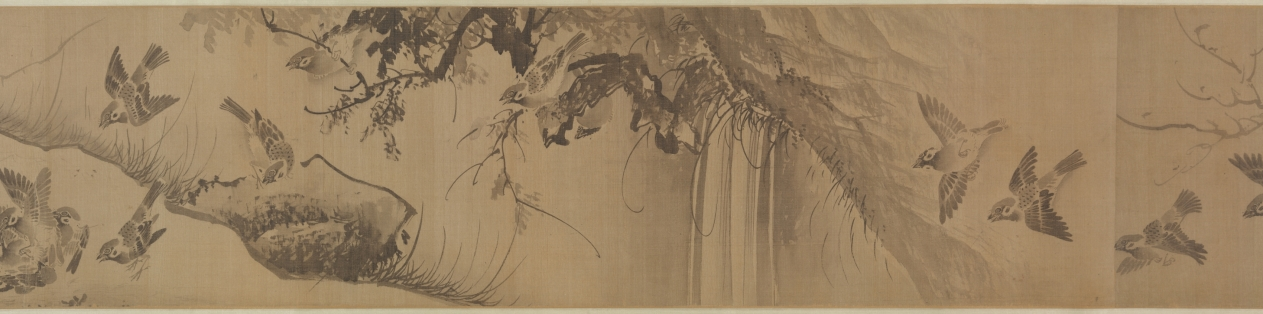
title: A Hundred Sparrows in a Lofty Grove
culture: China, Ming dynasty (1368–1644)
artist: attributed to Lin Liang (Chinese, 1416–1480)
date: 1368–1644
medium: handscroll; ink on silk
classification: Painting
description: Sparrows engaged in all kinds of activities frolic amid leafy branches, blades of grass, rocks, and a waterfall. As our eyes move over the scroll, the artist engages us in enjoying the sparrows’ carefree movements in a natural setting. The charming birds were painted from close observation in swift and fluent brushstrokes. Sparrows are a common bird and in Chinese painting they often represent the commoner in human society as opposed to the noble pheasant or peacock representative of the ruling class.